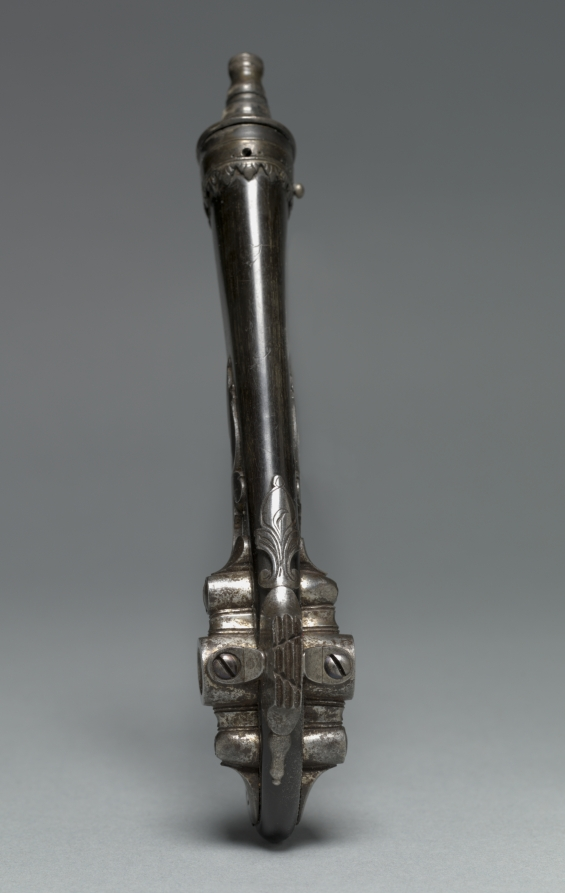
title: Combined Priming Flask and Wheel-Lock Spanner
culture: Germany or Austria, first half of 17th Century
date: c. 1600–1650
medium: horn with brass and steel mounts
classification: Arms and Armor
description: Early firearms required many tools and accessories for their proper use and maintenance. This clever design fulfilled a dual purpose as a spanner and priming flask. Small containers like this one would hold fine-grain gunpowder used to set off (or prime) the main charge in the barrel. A spanner would be used to operate a wheel-lock mechanism that enabled a gun to fire. On the gun, the jaws of the lock clamped a piece of flint or pyrites designed to rub against the rough edge of the wheel projecting into the pan. The wheel was revolved by a tightly coiled spring wound by the spanner and released when the gun's trigger was pulled causing sparks to ignite the gunpowder in the breech.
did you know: Many accessories that were used in hunting were made of the very animals that were to be hunted, this one here was made of horn.